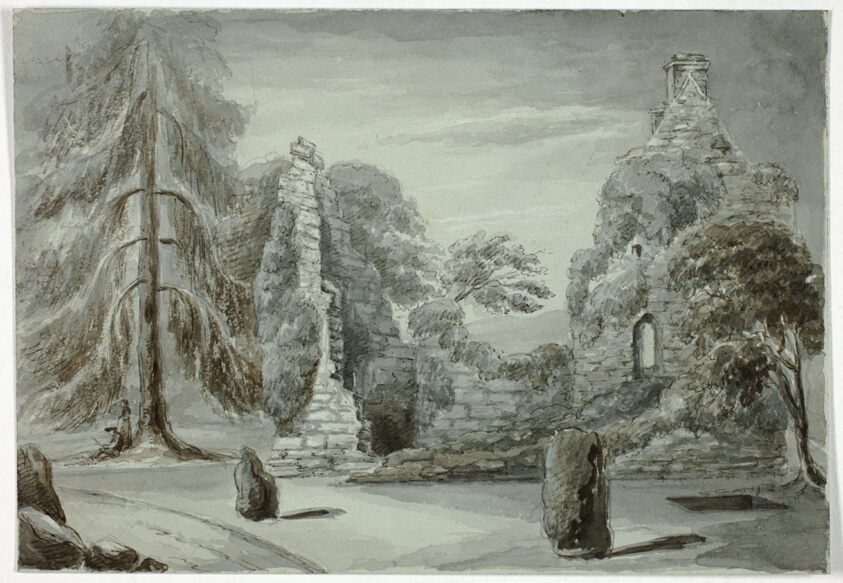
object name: Drawing and Watercolor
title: Burying Place, Finlarig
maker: Elizabeth Murray (English, c. 1815-1882)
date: October 1836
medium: Pen and brown ink, and brush and gray and brown wash, heightened with white gouache, on blue wove paper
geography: England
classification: ink or chalk wash; drawings (visual works); prints and drawing